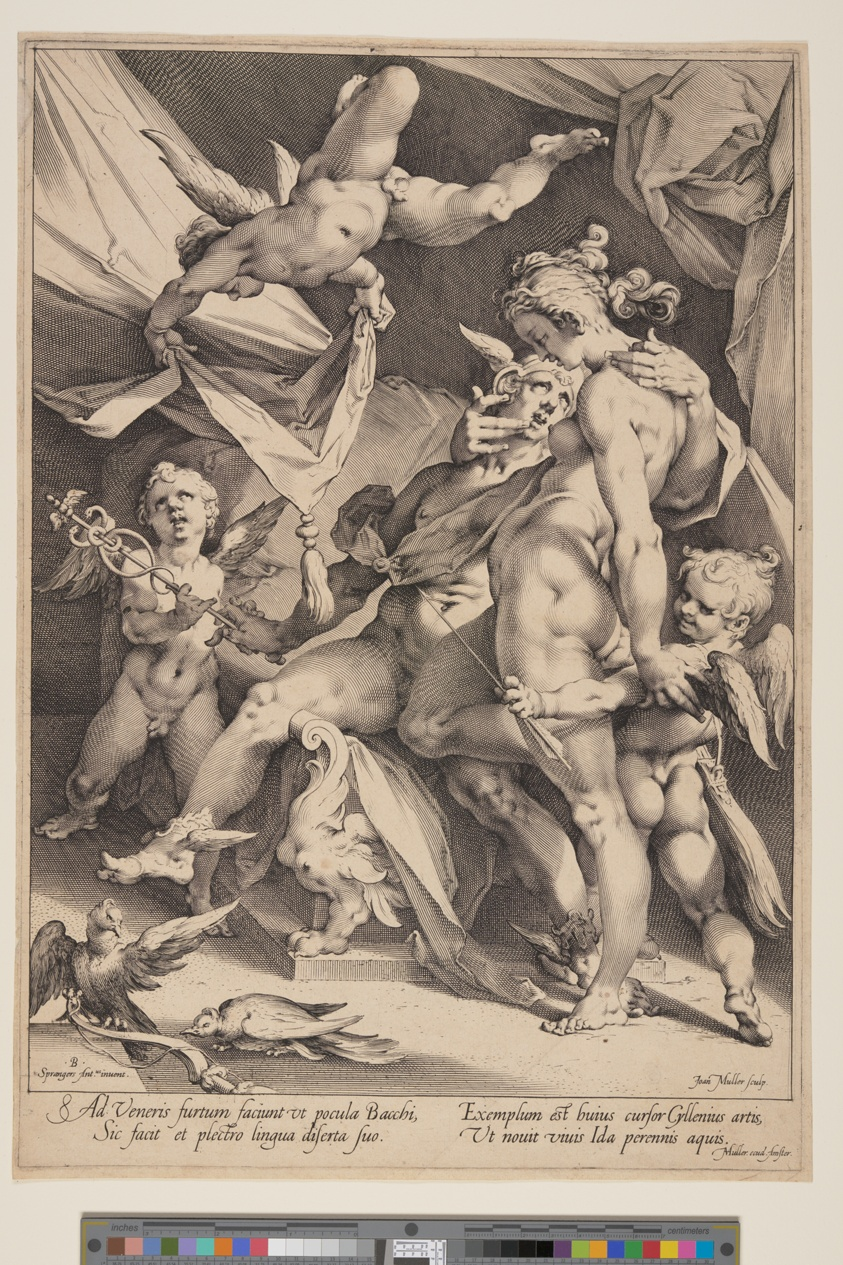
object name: Print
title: Venus and Mercury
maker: Jan Harmensz Muller (Dutch, 1571–1628); after Bartholomeus Spranger (Flemish, 1546–1611)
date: c. 1600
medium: Engraving on ivory laid paper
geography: Netherlands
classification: print; paper; prints and drawing; engraving